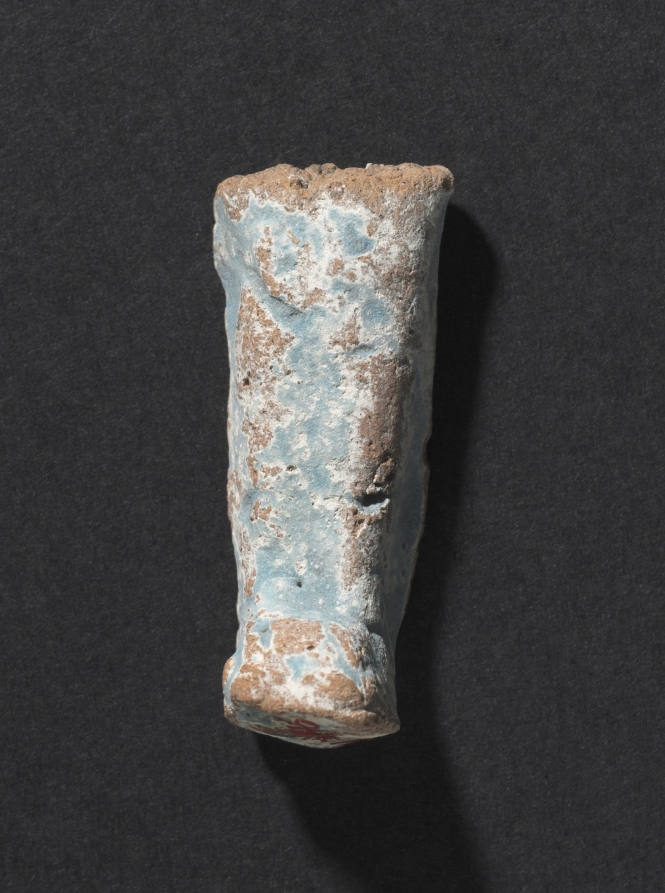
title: Shawabty of Ditamenpaankh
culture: Egypt, Late period (715–332 BCE), Dynasty 25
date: 715–656 BCE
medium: terracotta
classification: Funerary Equipment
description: High demand for shawabtys in the Late Period, a time when as many as 400 or more shawabtys were placed in the tomb with the deceased, gave rise to a specialized container for storing them: the shawabty box. This example is inscribed for the lady of the house, Ditamenpaankh, and was probably one of a pair originally made for her. The single-masted boat on the box's lid is perhaps an allusion to the pilgrimage of the deceased to the holy city of Abydos, the cult city of Osiris, king of the dead. The shawabtys inside are crude, mass-produced examples cast in an open mold. Made of terracotta, their blue paint imitates more costly shawabtys made of faience. As for the shawabty spell, it has been removed from its traditional location on the shawabty's front and relocated onto the sides of box, where it needed only to be written once, thus expediting production.